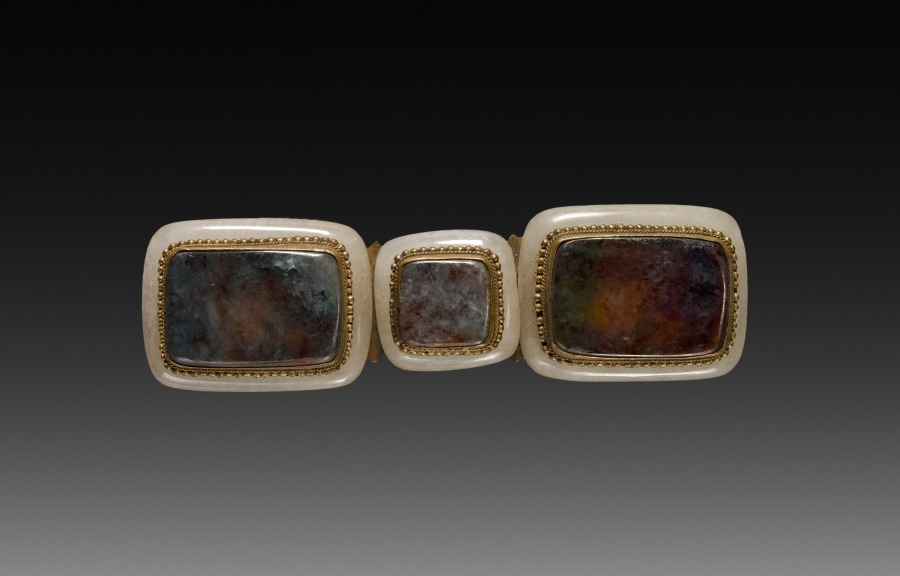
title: Buckle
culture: China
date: 1900s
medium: brass with veneer of white jade set with agate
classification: Jewelry